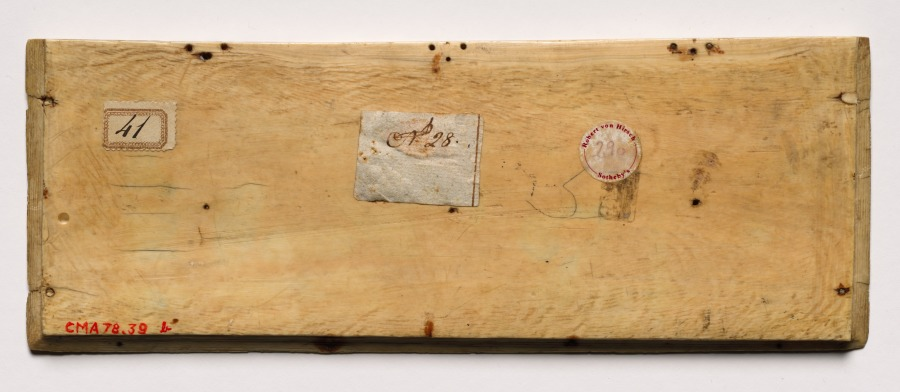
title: Panel from a Casket with Scenes from Courtly Romances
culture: France, Lorraine?, Gothic period, 14th century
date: 1330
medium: ivory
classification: Ivory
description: Among the most lavish and deluxe products of French ivory workshops of the 1300s were large caskets carved with elaborate scenes drawn from courtly romances. This panel shown here comes from such a casket. This side panel depicts scenes such as Sir Gawain and the Lion and Lancelot crossing the sword bridge. These images suggesting chivalry, fertility, virginity, youth, and an idealized courtly love likely derive from manuscripts including the Roman de la Rose and the poems of Chrétien de Troyes. Such texts were often found within the libraries of the aristocracy, so the casket’s symbolic images would have been readily understood. Such caskets may have originally been gifts between a man and a woman. The expense of the material, ivory, suggests they were produced for an elite clientele.